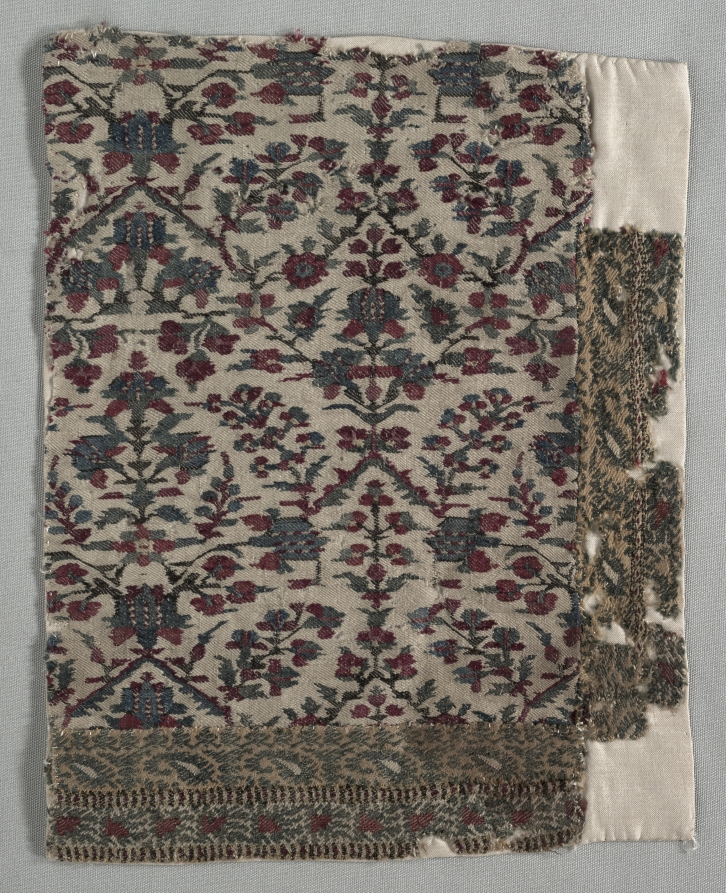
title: Border Fragment of a Shawl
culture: India, Kashmir, late 18th - early 19th century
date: late 1700s - early 1800s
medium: tapestry twill; wool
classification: Textile